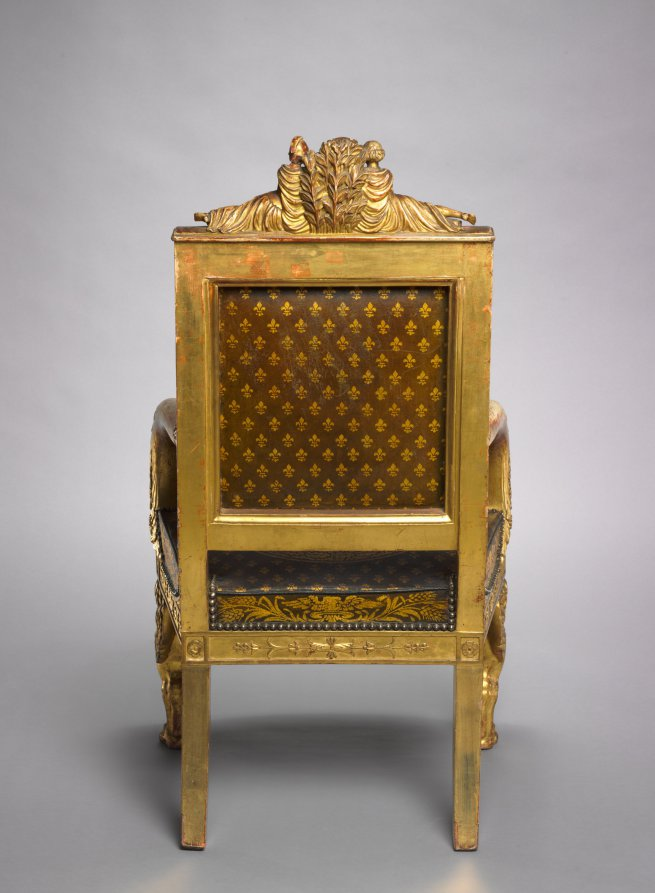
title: Child's Throne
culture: France, Paris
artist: Pierre-Marie Balny le Jeune (French, 1832)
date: 1822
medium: carved and gilded wood, leather upholstery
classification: Furniture and woodwork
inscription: inscribed with stencils inside back rail: BLONDEL TAPISSIER/RUE ST. ANTOINE N 72 1822 inscribed in ink lower edge back rail: 12 JANVIER 18[22?]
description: This chair was made for the young, presumed successor to the French throne who ruled briefly as Henri V in 1830, the last of the direct Bourbon line. He is depicted at the center of the top rail protected by female figures representing France and Minerva, the Roman goddess of wisdom. Fleurs-de-lis and the Gallic rooster, symbols of French royalty and the French people, decorate the upholstery.